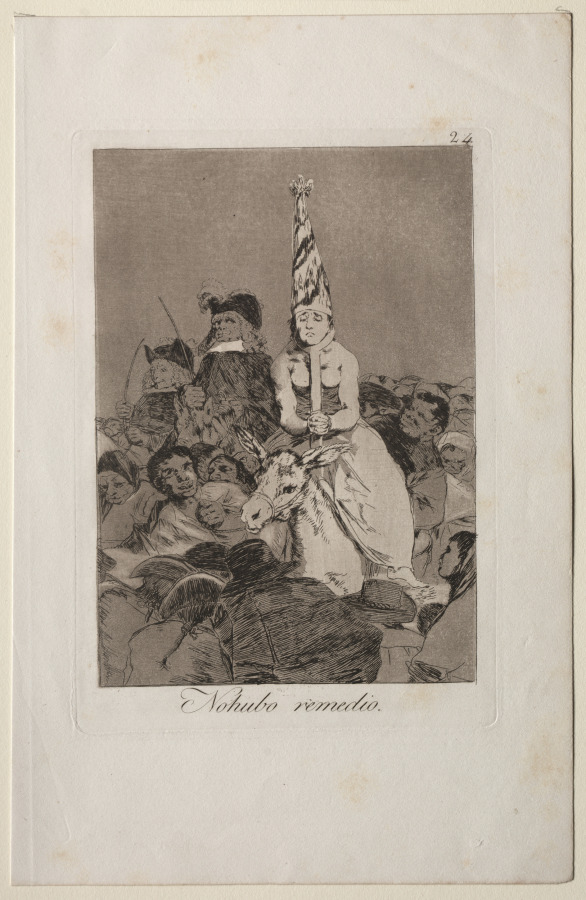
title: Nothing Could Be Done About It, Plate 24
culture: Spain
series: Los Caprichos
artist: Francisco de Goya (Spanish, 1746–1828)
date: 1799, printed c. 1855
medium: etching and aquatint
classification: Print